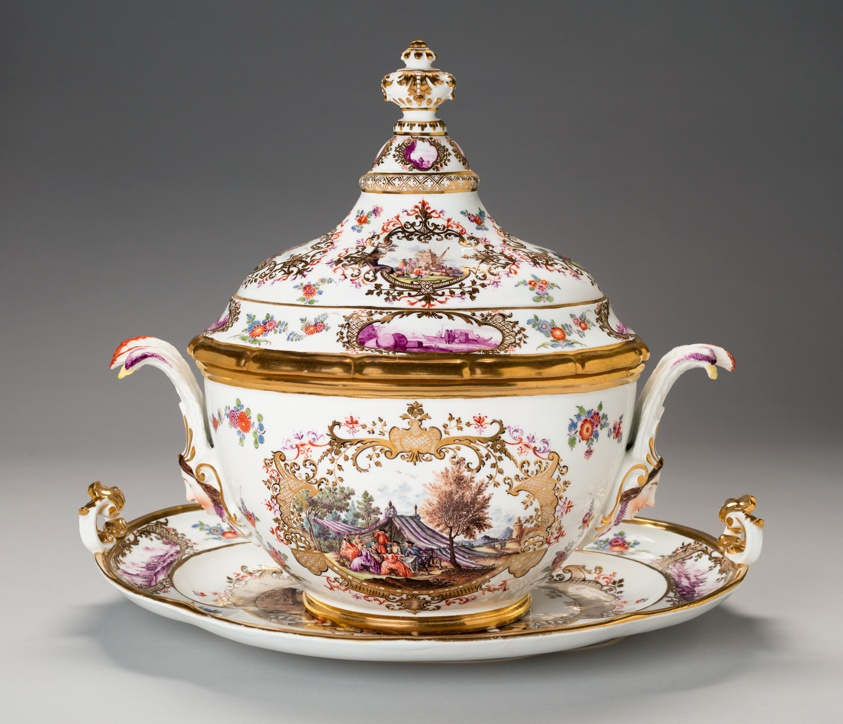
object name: Ceramics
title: Covered Tureen and Stand (One of a Pair)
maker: Meissen Porcelain Manufactory (Germany, founded 1710)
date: c. 1740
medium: Hard-paste porcelain, polychrome enamels and gilding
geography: Germany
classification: porcelain; european decorative arts; ceramics